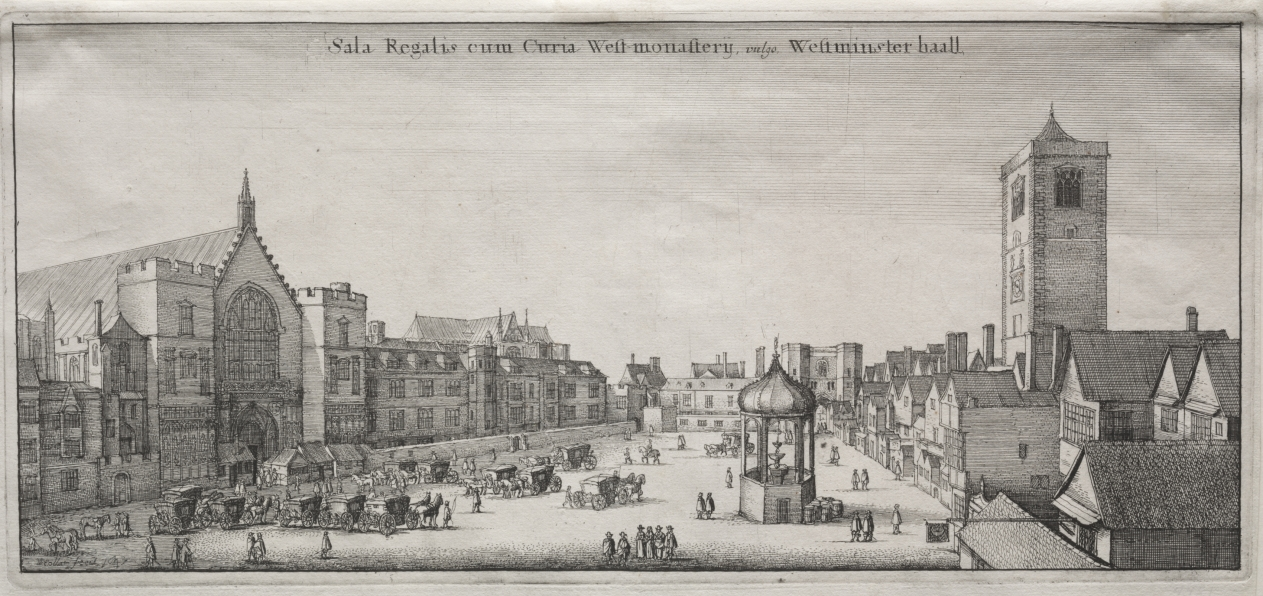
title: View of London: New Palace Yard with Westminster Hall, and the Clock House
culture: Bohemia, 17th century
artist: Wenceslaus Hollar (Bohemian, 1607–1677)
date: 1647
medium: etching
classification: Print